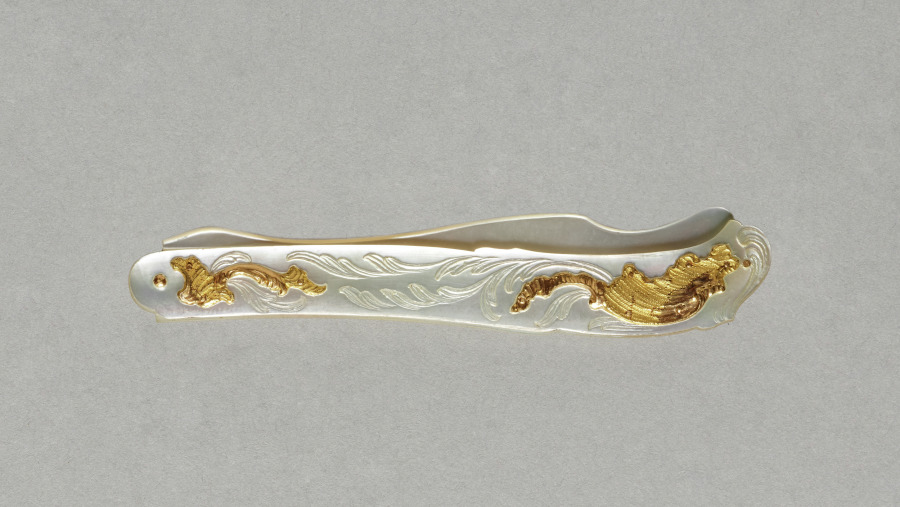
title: Paper Knife from a Sewing Box (Nécessaire)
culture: Austria, possibly Vienna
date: c. 1765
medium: gold and mother-of-pearl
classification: Miscellaneous